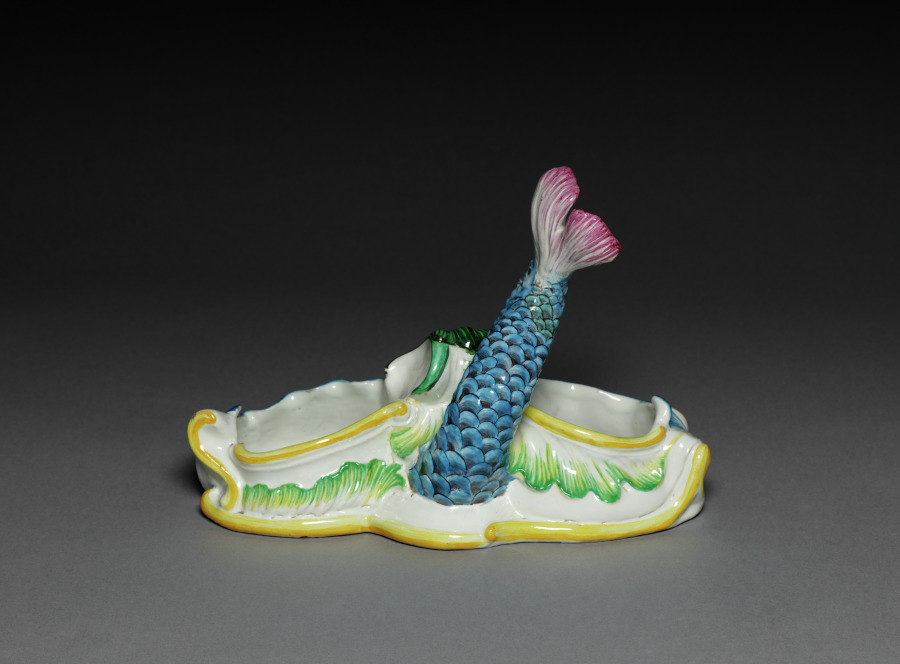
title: Center Piece with Dolphin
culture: Germany, Höchst, 18th century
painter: Johannes Zeschinger (German, 1723-)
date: 1750–1775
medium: faience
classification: Ceramic